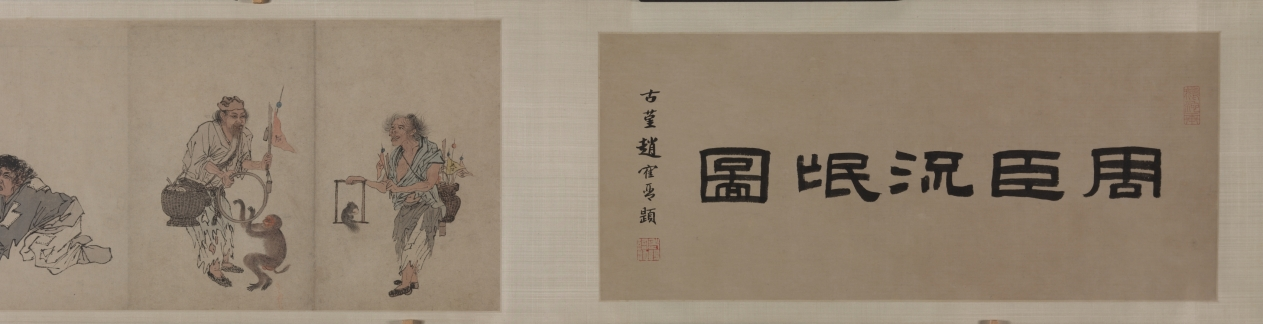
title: Beggars and Street Characters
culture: China, Ming dynasty (1368–1644)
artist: Zhou Chen (Chinese, c. 1450–c. 1536)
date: 1516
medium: Handscroll; ink and light color on paper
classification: Painting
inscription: 題: 周臣流氓圖. 古堇趙鶴琴 [印] 老鶴臨池; 鵝池軒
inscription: 正德丙子秋七月，閒窗無事 ，偶記素見市道丐者種種態度。乘筆硯之便，率爾圖寫。雖無足觀，亦可以助警勵世俗云。 東邨周臣記 [印]東邨; 舜卿; 鵝場散人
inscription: 吳中東邨周君，善丹青，尤長於人物。此圖其所見盛市丐者之狀種種，各盡其態，觀者絕倒。嗟乎，今之晝夜乞哀以求富貴者，安得起周君而貌之耶。臥雲徵君出示，余漫題其後。 甲子歲十月吳門黃姬水 [印] 士雅山人; 另一印不詳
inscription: 是冊凡數種。其飢寒流離疲癃殘疾之狀，種種之異。觀此而不惻然心傷者，非仁人也。計正德丙子逆瑾之流毒已數年。而[江]彬 [錢] 寧輩肆虐方熾。意分符剖竹諸君，亦鮮有能撫字其民者。然則舜卿此作，殆與鄭君 流民圖同意。其有補於治道者不淺，要不可以墨戲忽之也。 長洲張風翼題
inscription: 東村此筆，蓋圖寫飢寒乞丐之態，以警世俗耳。而質山 [黃姬水]欲其寫昏夜乞哀，而靈墟[張鳳翼]則擬之於安上門圖。二君之見，其各有所指哉。昔唐六如每見周筆，輒稱曰：周先生！蓋深服其神妙之不可及。若此冊者，信非他人可能而有符於六如之心伏矣。豈易得耶。若黃、張之指，則又論於畫之外，不在於形似筆墨之旨也。 萬歷丁丑十二月三日 茂苑文嘉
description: Zhou Chen from Suzhou provides rare depictions of impoverished people that once filled the city’s markets and streets. Despite Suzhou’s prosperity, its rapid growth polarized society, including the wealthy and those who had deserted their farmlands, who were without homes, unemployed, or sick. Amid these are figures who inspire fear rather than empathy. The painting may thus be informed by local practices at the end of the lunar year, in which street beggars, in exchange for food or money, would dress up like ghosts and demons to drive out evil forces.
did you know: Although Zhou Chen's original composition was an album of 24 figures, today it is mounted as two handscrolls, one in the Cleveland collection and one in the Honolulu Museum of Art.